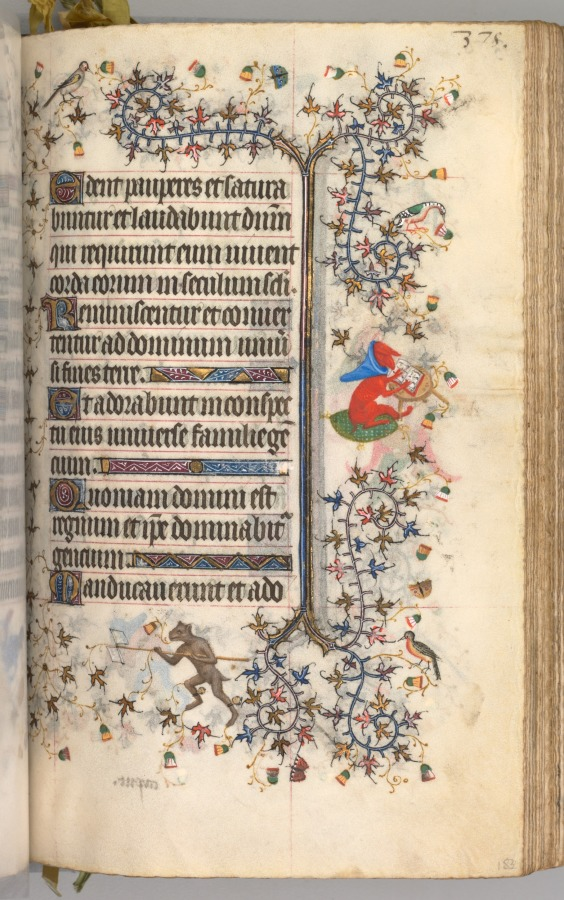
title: Hours of Charles the Noble, King of Navarre (1361-1425): fol. 183r, Text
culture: France, Paris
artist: Master of the Brussels Initials and Associates (French)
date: c. 1405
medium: ink, tempera, and gold on vellum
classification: Bound Volume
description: This precious volume was obviously highly prized by its owner, the French-born King of Navarre, who had his coat of arms painted on no less than twenty folios. Rather than directly commissioning this manuscript from a specific workshop, it seems that Charles the Noble acquired his book of hours -- perhaps ready-made for the luxury market -- while on a trip to Paris in 1404-05. A collaborative effort, six painting styles are evidenced within the pages of this codex, those of two Italians, two Frenchmen, and two Netherlanders. The painter who was responsible for the planning and decoration of the book, and who produced seventeen of the large miniatures, was a Bolognese artist known as the Master of the Brussels Initials. His principal assistant, responsible for most of the borders, was a Florentine who signed his name "Zecho" da Firenze on folio 208 verso.